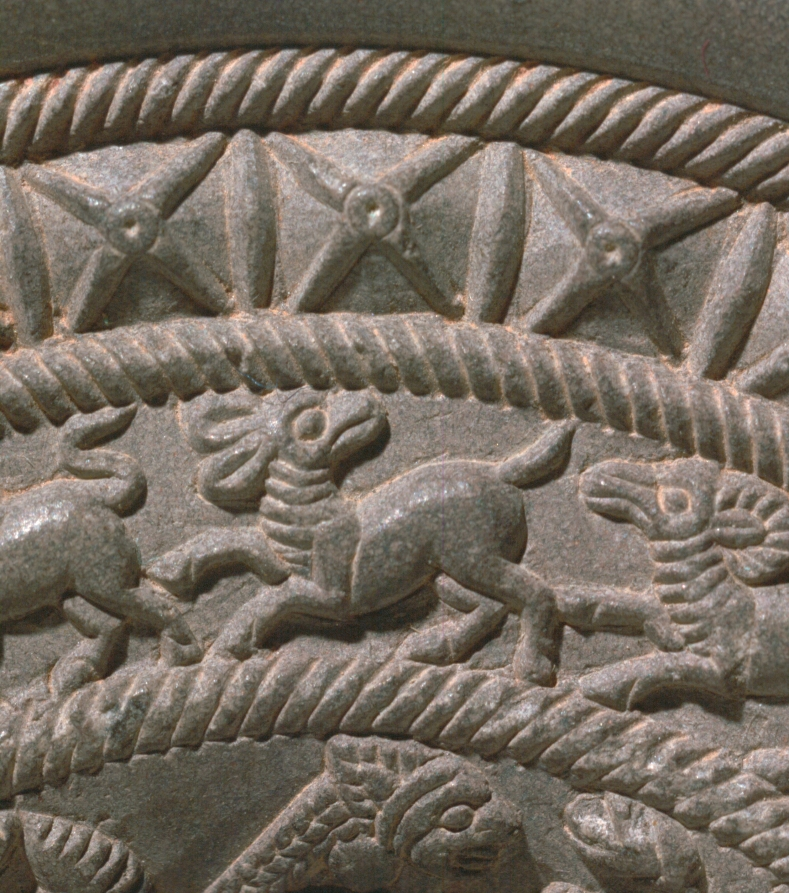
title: Ringstone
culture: India, Maurya period (322–185 BCE)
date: 200s BCE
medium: steatite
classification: Sculpture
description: Ringstones are among the earliest works of art to be created in stone during India's historical period. This example is finely carved with detailed images of affectionate couples and palm trees, running animals, and geometric motifs in concentric circles. The function of ringstones remains uncertain, since none of the surviving examples is inscribed or explained in a text.